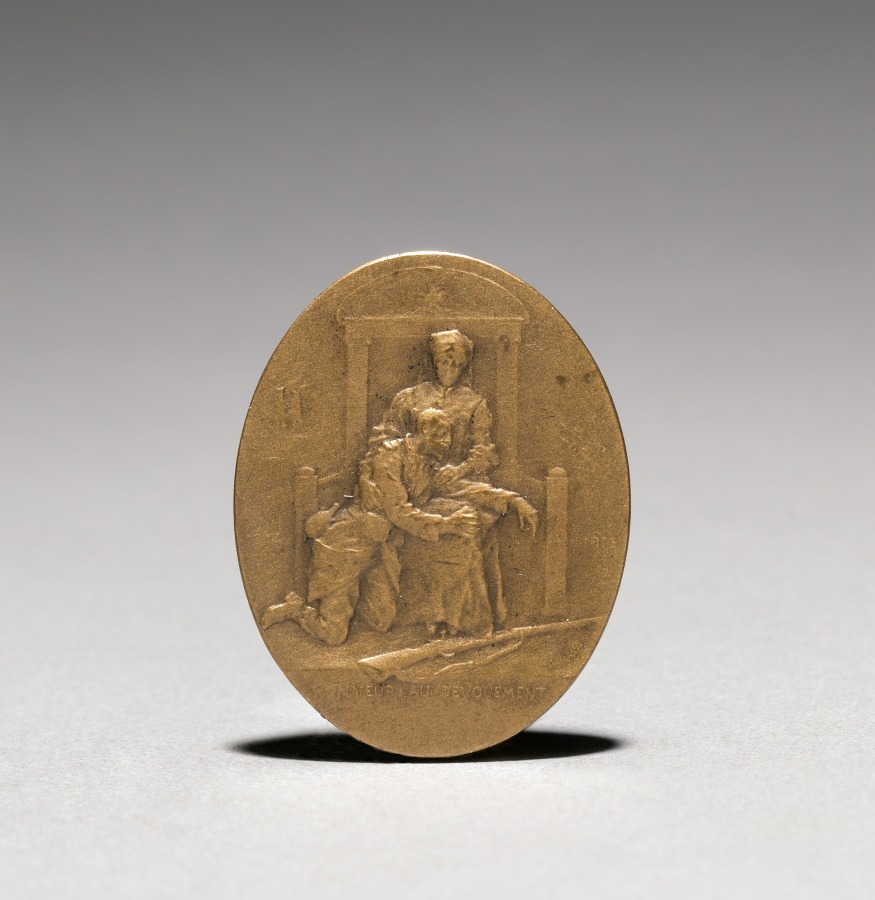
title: Medallion (obverse)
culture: France, 19th-20th century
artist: Jean Paul Aube (French, 1837–1916)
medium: bronze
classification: Metalwork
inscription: "Honneur au devouement" (honor to self sacrifice); inscribed: "P. Aube."